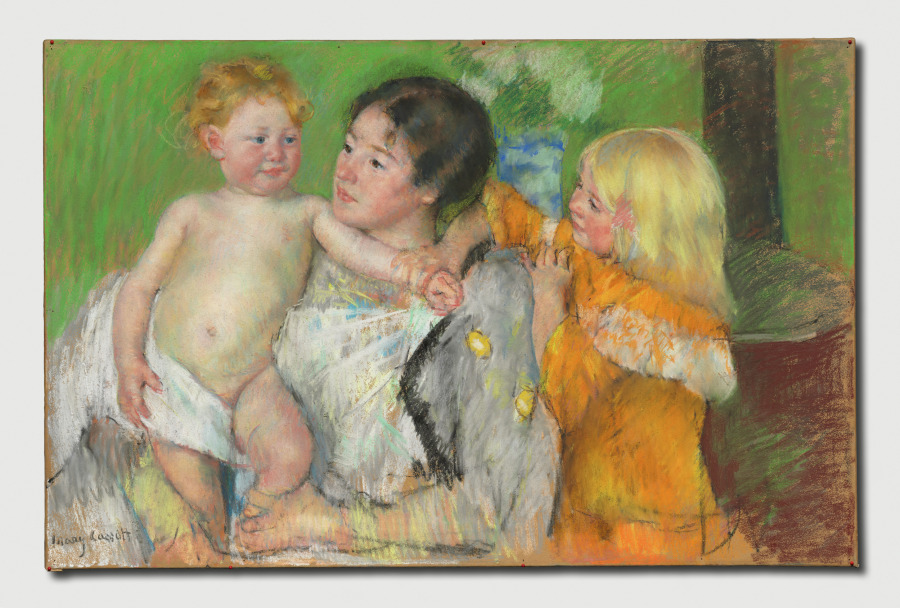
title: After the Bath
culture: America, late 18th-19th Century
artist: Mary Cassatt (American, 1844–1926)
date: 1901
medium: pastel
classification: Drawing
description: Mary Cassatt began using pastel in the 1870s and continued to experiment with the medium throughout her career. This drawing depicts a mother and child, one of the artist's preferred subjects. Cassatt typically used the technique seen here, in which she finished her sitters' faces with a high degree of detail but rendered the rest of the composition in a much looser and sketchier style.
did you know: Mary Cassatt once commented that pastel was "the most satisfactory medium for [portraying] children," since they could not sit still for long and the medium allowed for rapid sketching.